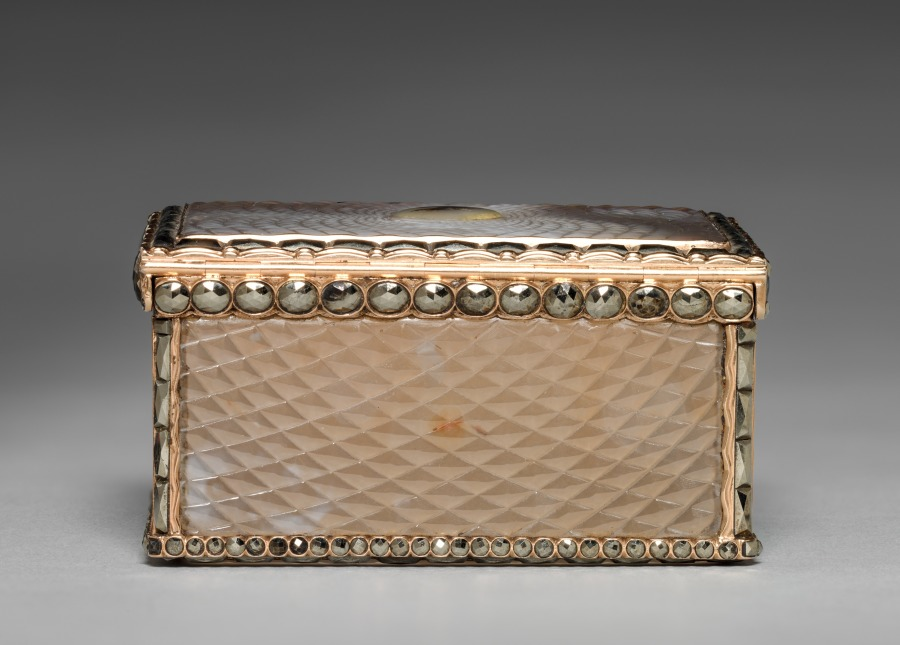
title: Snuff Box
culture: England, London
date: c. 1750–60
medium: gold-mounted agate, engine-turned panels, hematites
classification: Miscellaneous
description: Luxurious personal objects, like this snuff box, were an essential part of a privileged wardrobe during the 1700s and early 1800s, emphasizing their owner’s refinement and wealth. Their glittering surfaces, however, disguised a system based on the labor and suffering of enslaved or indentured people, whether in gold or gemstone mines, tobacco farms, or shops where these goods were made. Like cotton, sugar, and tea, snuff came from British colonies in America, India, and the Caribbean, where enslaved people were exploited to grow these crops under extremely harsh conditions.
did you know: This small, elaborate box held snuff, a form of powdered tobacco that was inhaled in tiny amounts.